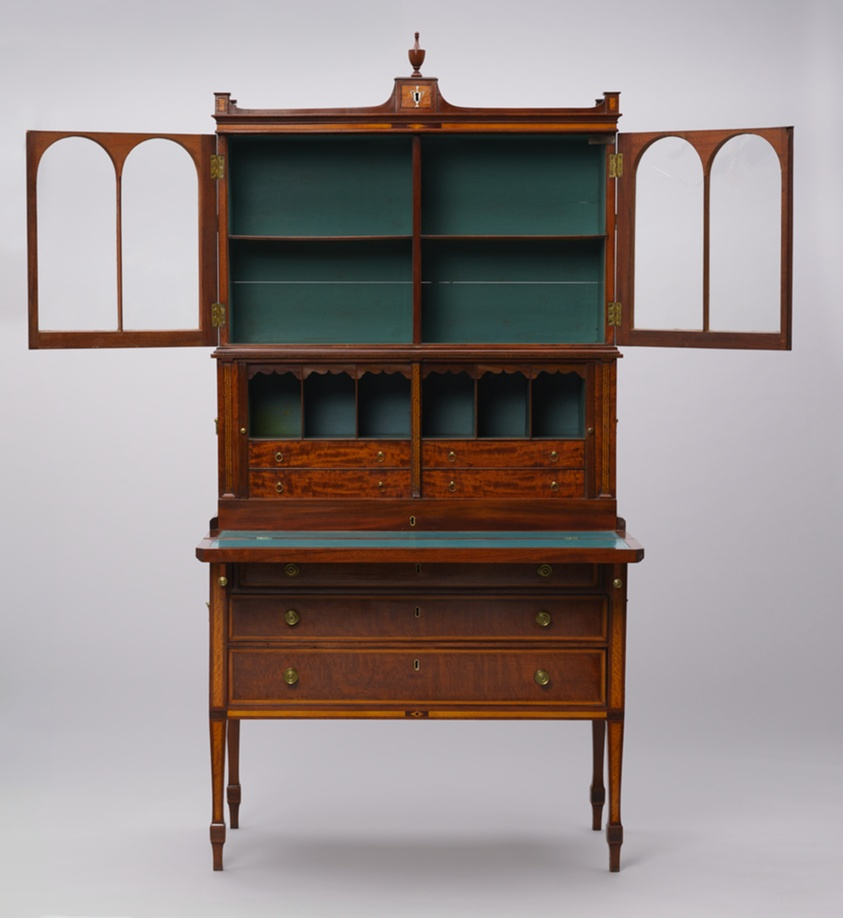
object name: Furniture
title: Tambour Desk and Bookcase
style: federal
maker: Attributed to the workshop of John and Thomas Seymour (American, active 1793–1804); Or attributed to the workshop of Thomas Seymour (American, active 1804–1817); Boston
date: c. 1800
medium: Mahogany, satinwood, white pine, cherrywood, chestnut, with brass, ivorine, and leather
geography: Boston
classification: furniture; american arts; american decorative arts; bookcase; decorative arts; desk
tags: furniture, cabinets, shelves, drawer, locks, keys, bookcase, decorative arts, desk, escutcheons